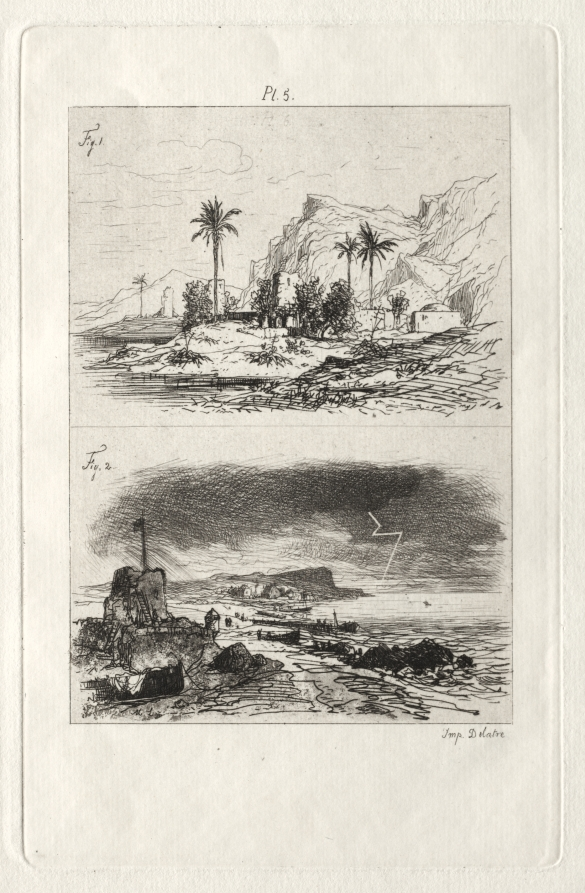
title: From Treatise on Etching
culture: France, 19th century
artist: Maxime Lalanne (French, 1827–1886)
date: 1866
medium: etching and engraving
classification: Print